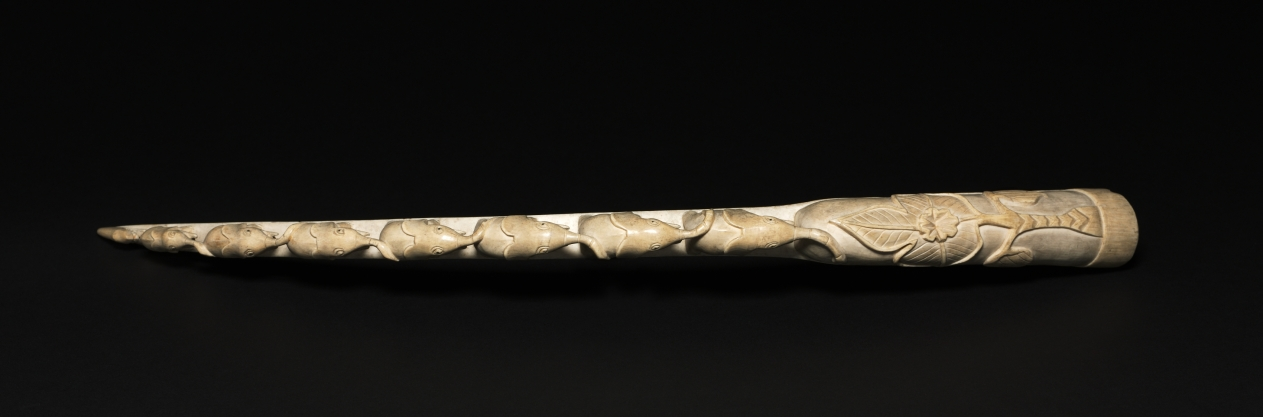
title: "Elephant Bridge" souvenir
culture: Central Africa, Democratic Republic of the Congo, 20th century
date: 1900s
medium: Elephant ivory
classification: Sculpture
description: This carving was made to appeal to Europeans and Americans in Central Africa, and did not draw from local aesthetics. It depicts an "elephant bridge," where the pachyderms are arranged with trunks and tails touching along the natural curve of an ivory tusk. Such compositions were often made in Japan, India, or China.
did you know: Skilled carvers in Central Africa could easily imitate other styles presented by patrons who commissioned works, such as this Congolese take on an Asian composition of elephants.